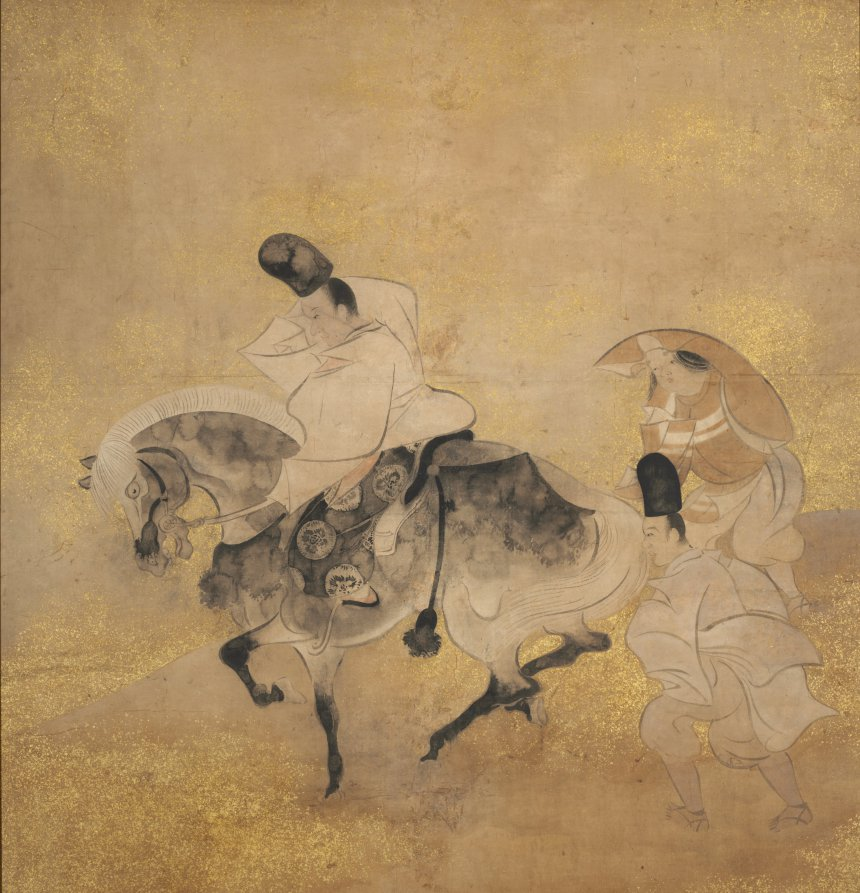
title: Crossing at Sano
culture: Japan, Edo period (1615–1868)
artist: studio of Tawaraya Sōtatsu (Japanese, c. 1570–c. 1640)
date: c. 1600–1640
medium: Hanging scroll mounted as a single-panel screen; ink, color, and gold on paper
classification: Painting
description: Like many paintings from the Sōtatsu studio, a Kyoto-based atelier that ran the shop Tawaraya, this one is done in ink, mineral colors, and gold, and is formally reminiscent of 12th- and 13th-century paintings associated with the Japanese aristocracy. It depicts a man on horseback with two attendants crossing a bridge that once spanned the Kino River in Sano in eastern Wakayama Prefecture. The composition was inspired by a poem by Fujiwara no Teika (1162–1241) that translates as follows: I stop my horse, but there is no shelter as I brush off my sleeves at Sano Crossing in the evening snow.